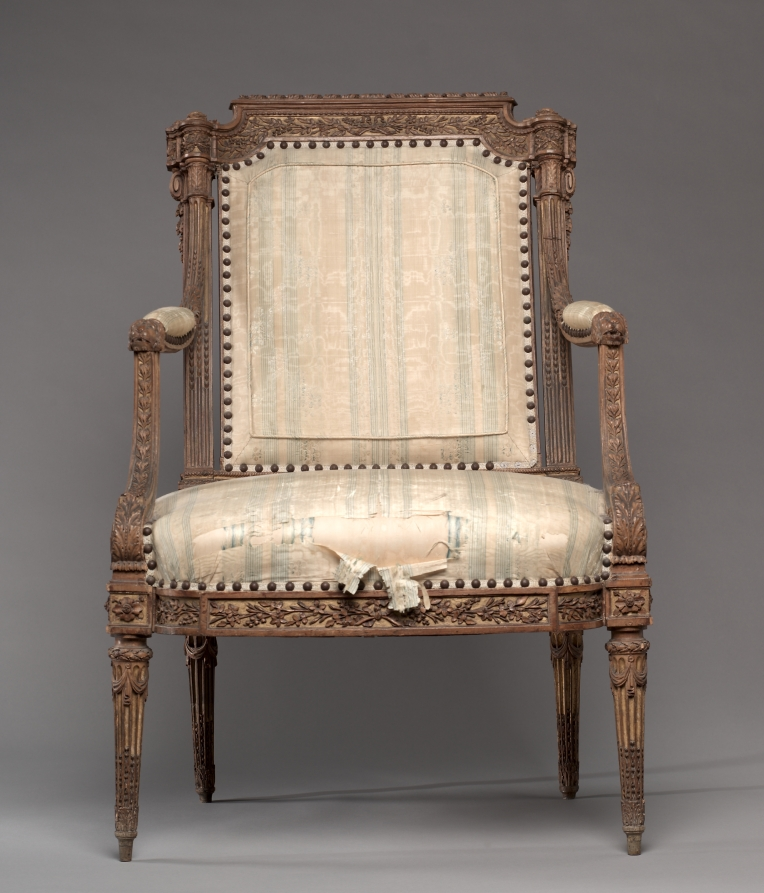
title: Armchair (Fauteuil) (2 of 2)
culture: France, 18th century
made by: Nicolas-Denis Delaisement (French)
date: c. 1785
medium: boxwood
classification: Furniture and woodwork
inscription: signed on front and back of frame of seat underneath: Delaisement with inverted "s."